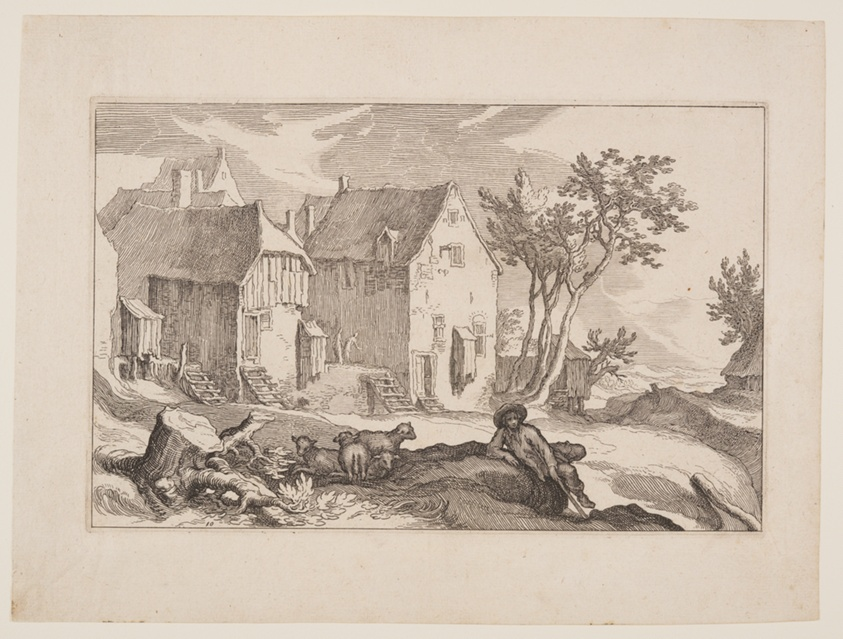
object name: Print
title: Plate 10, from Landscapes with Farmhouses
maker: Boëtius Adamsz. Bolswert (Flemish, 1580–1633); after Abraham Bloemaert (Dutch, 1566–1651)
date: 1614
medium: Etching on ivory laid paper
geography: Flanders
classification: print; paper; prints and drawing; etching